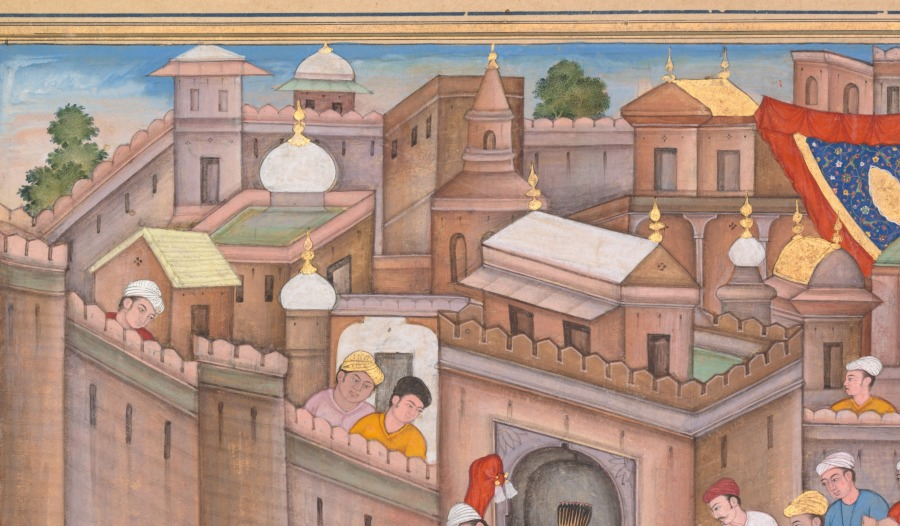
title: The siege of Arbela in the era of Hulagu Khan, page from a Chingiz-nama (Book of Chingiz Khan) of the Jami al-tavarikh (Compendium of Chronicles) of Rashid al-Din (Persian,1247–1318)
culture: Mughal India, court of Akbar (reigned 1556–1605)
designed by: Basavana (Indian, active c. 1560–1600)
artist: Sur Das (Indian)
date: c. 1596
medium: Gum tempera and gold on paper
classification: Painting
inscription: recto lower left: [translated] Siege of the fort of Irbil by Urgatu Nuyan and the attainment of victory by command of Hulagu Khan.; verso overall: [text]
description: A Mongol conqueror riding a white horse gazes stonily at his defeated West Asian opponent in a scene that took place more than 300 years before this painting was made. By the end of the 1500s there was a new emphasis on creating paintings to accompany historical texts. Visually, the diagonal composition with cityscape at the top of the page—also found among the earliest Mughal paintings—was expanded to include throngs of participants and a startling new naturalism. Painting from the Akbar period reached its maturity by the 1590s in works such as this: dynamic in composition and gestures but contained within organized spaces and emphasized three-dimensionality.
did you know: This fortified city in the heart of Kurdistan, now called Irbil, is in Iraq.